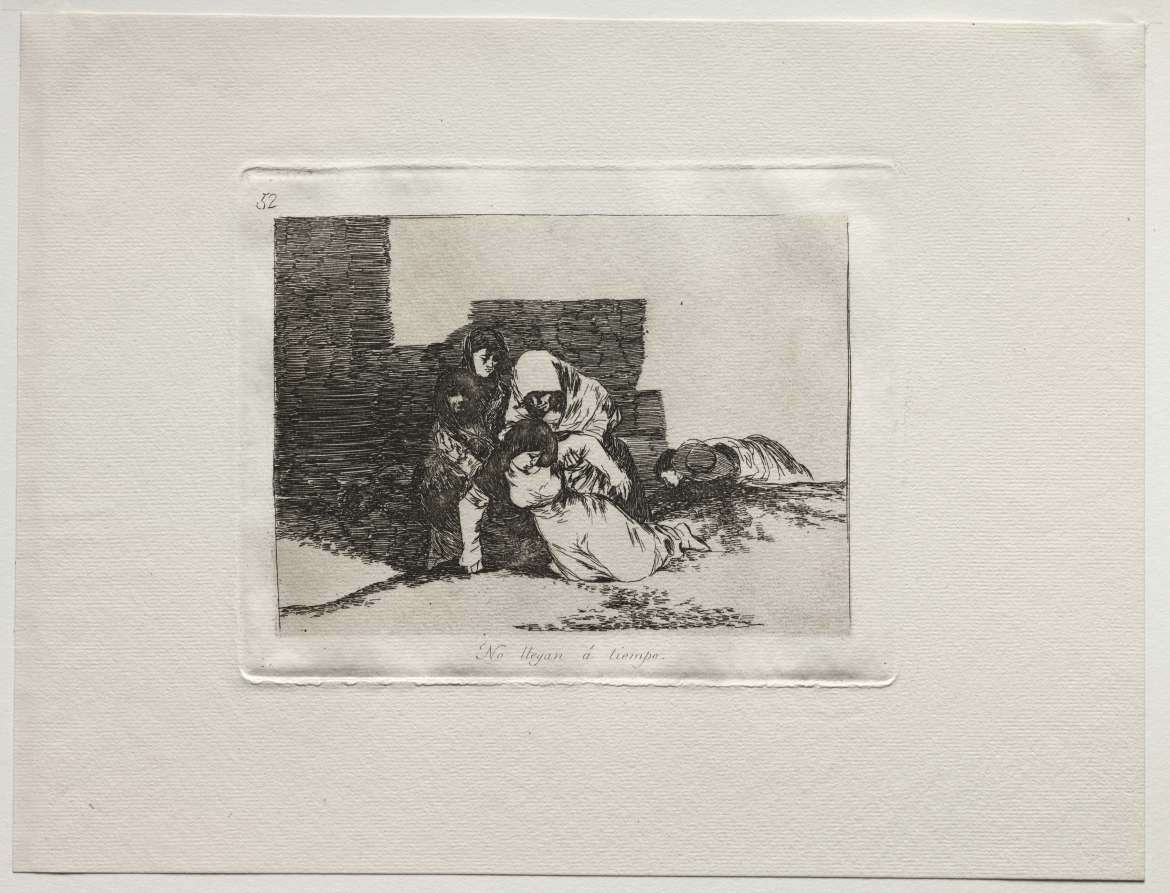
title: The Horrors of War: They Do Not Arrive In Time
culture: Spain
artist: Francisco de Goya (Spanish, 1746–1828)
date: c. 1810–20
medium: etching and aquatint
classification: Print